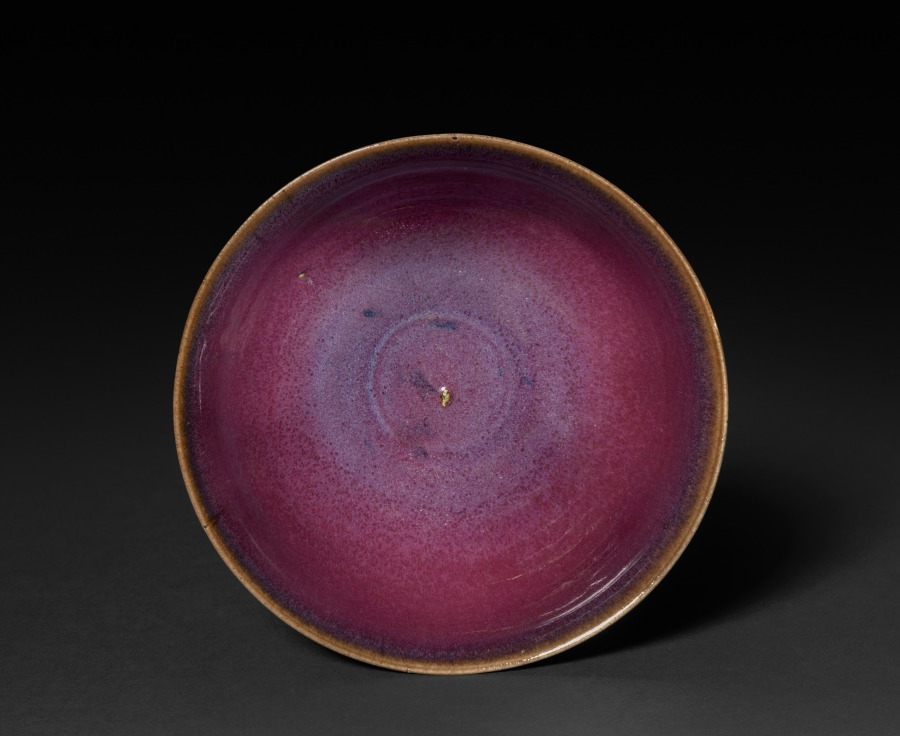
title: Bowl: Jun ware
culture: South China, Yuan dynasty (1271-1368) - Ming dynasty (1368-1644)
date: 14th-15th Century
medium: glazed gray stoneware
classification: Ceramic